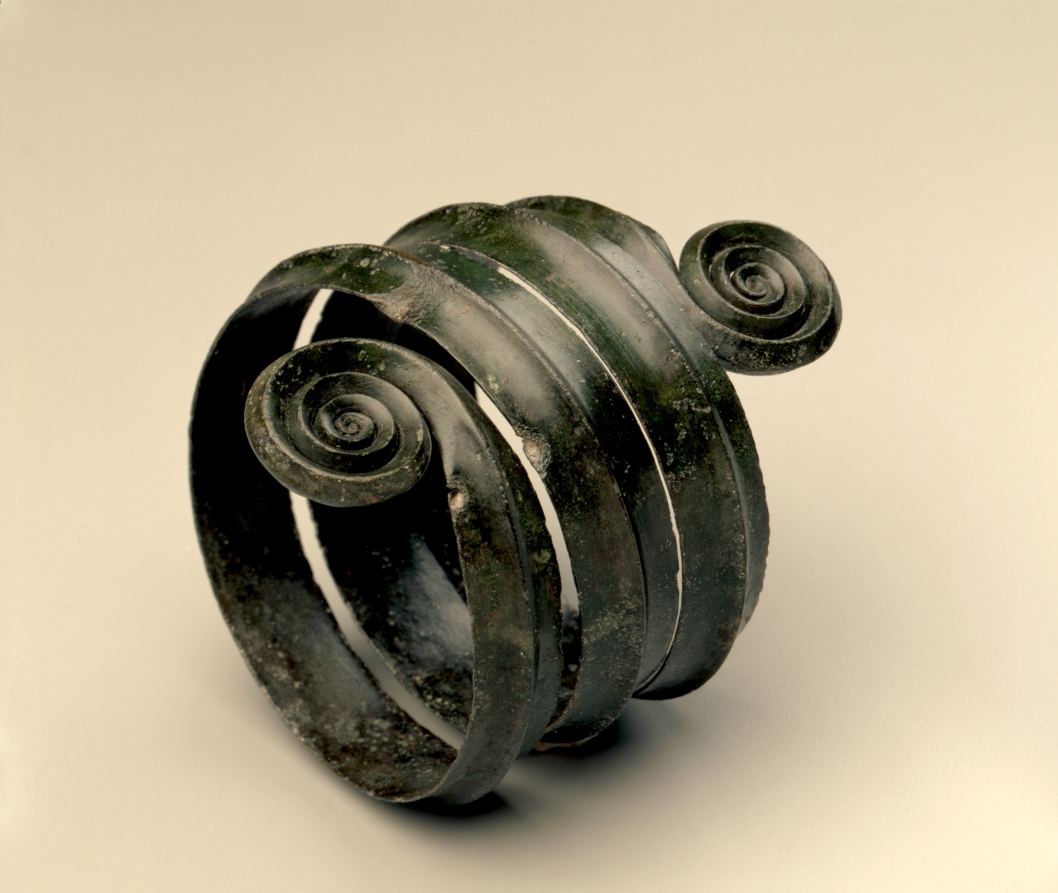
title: Turned Armilla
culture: Hungary, Bronze Age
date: c. 1500 BCE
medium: bronze, wrought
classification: Metalwork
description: Europe. As the spiral mimics forms found in nature - specifically in nautilus shells - it is the basis for logarithmic measures of progression in measurement and growth, which in turn help establish the Fibonacci sequence. Through this sequence we can analyze the phenomenon of spiral designs, specifically in nautilus shells, where the radius of each new chamber grows at a rate determined by a specific proportion to the previous one.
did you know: This armilla or arm ornament has a ridge along the spine, ending in a spiral at both ends.